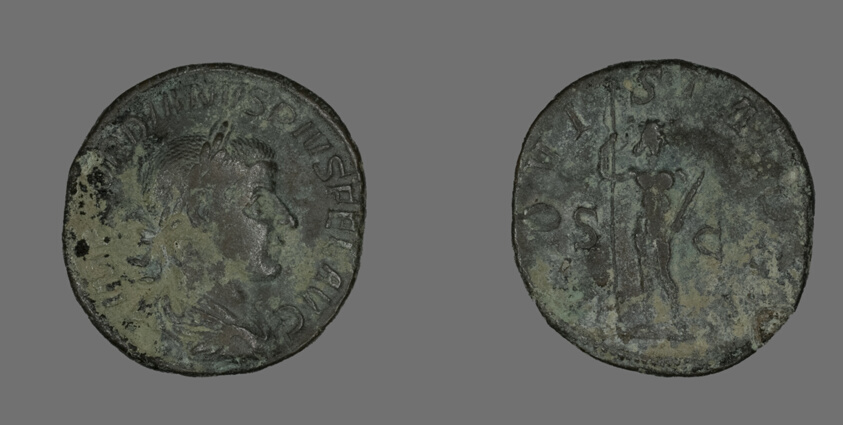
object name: Coin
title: Sestertius (Coin) Portraying Emperor Gordianus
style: roman (ancient, style or period), ancient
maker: Roman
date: 238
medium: Bronze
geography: Roman Empire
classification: coin; ancient art